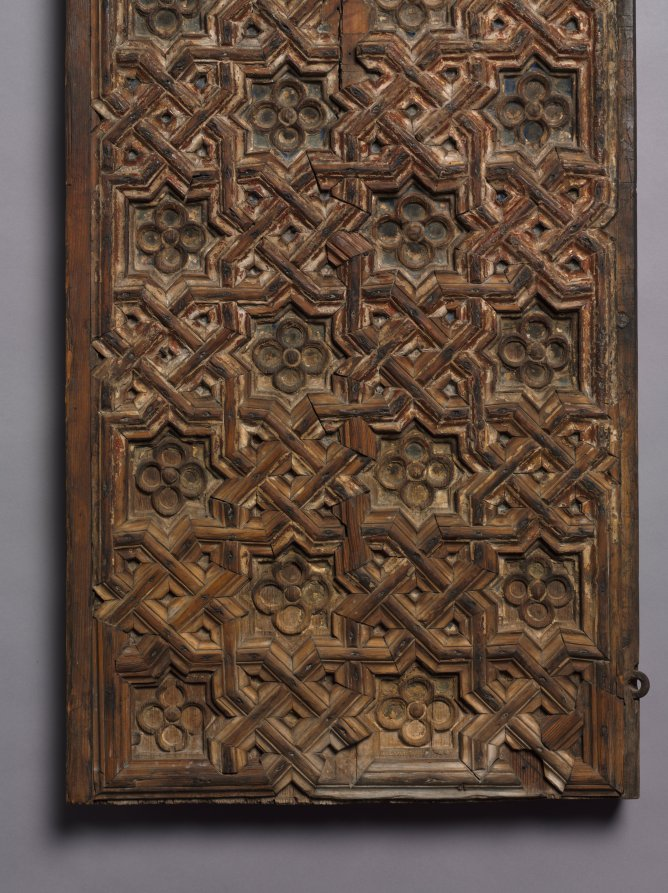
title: Door (right)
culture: Spain, early 15th century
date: early 1400s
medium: gilded and painted wood (pine)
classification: Furniture and woodwork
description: Typical of Muslim-inspired ornamentation, these doors reflect a love of geometric decoration stemming from a nonrealistic artistic tradition. They consist of applied wood strips that form eight-point stars, flowers, and geometric interlace designs. Such designs are reflected in the tiles, ceramic vessels, and metalwork of Muslim-occupied Spain. The origin of the doors is not known, but they may have belonged to a palace or domestic residence. In 711 the Moors had invaded and conquered nearly the entire peninsula. During the next 750 years, independent Muslim states were established, and the entire area of Muslim control became known as Al-Andalus. Muslim philosophers and scientists developed knowledge in areas like medicine, optics, algebra, chemistry, and geometry, as seen here.